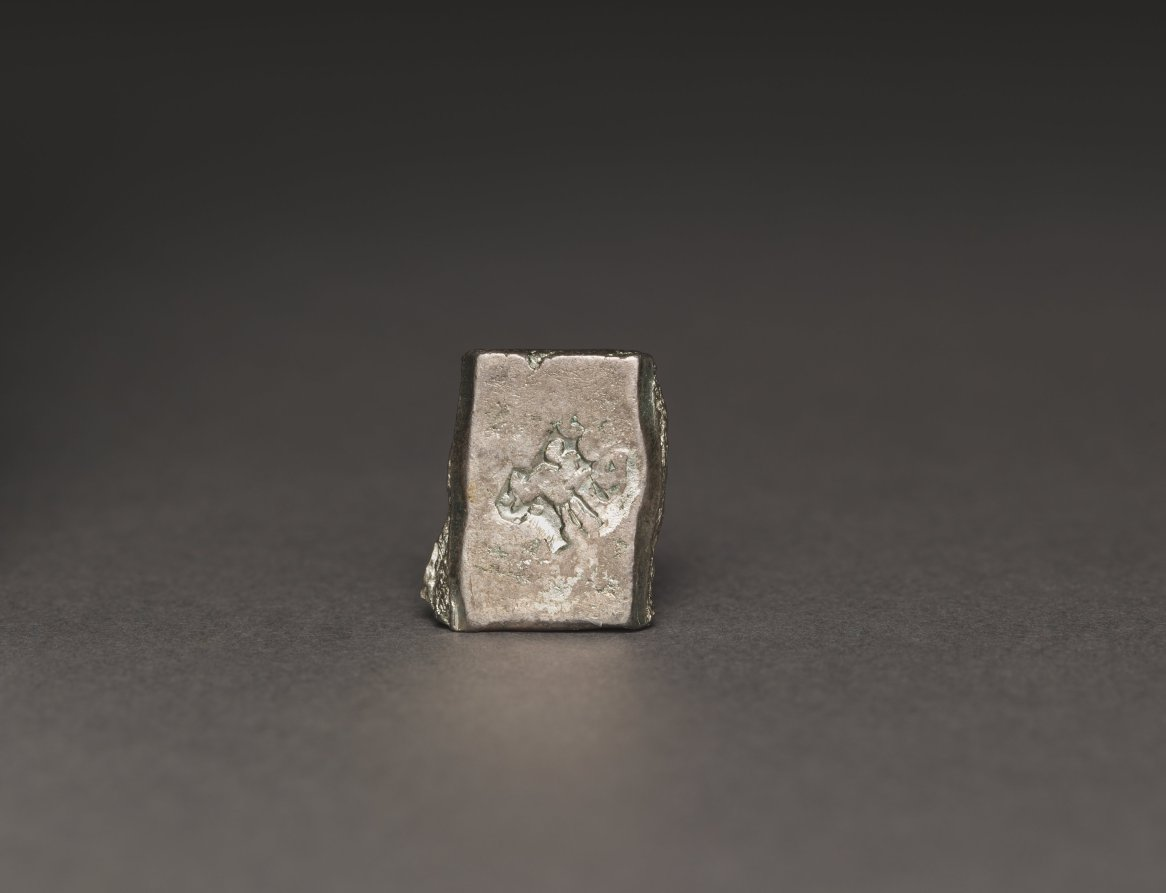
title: Punch-Marked Coin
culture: India, Rajasthan, Maurya period (322–185 BCE)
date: 400–300 BCE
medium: silver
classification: Coins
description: Indigenous Indian coinage was cut to weight from sheets of silver or copper and punch-marked, instead of die-cast. Each punch-marked coin had a unique combination of symbols.